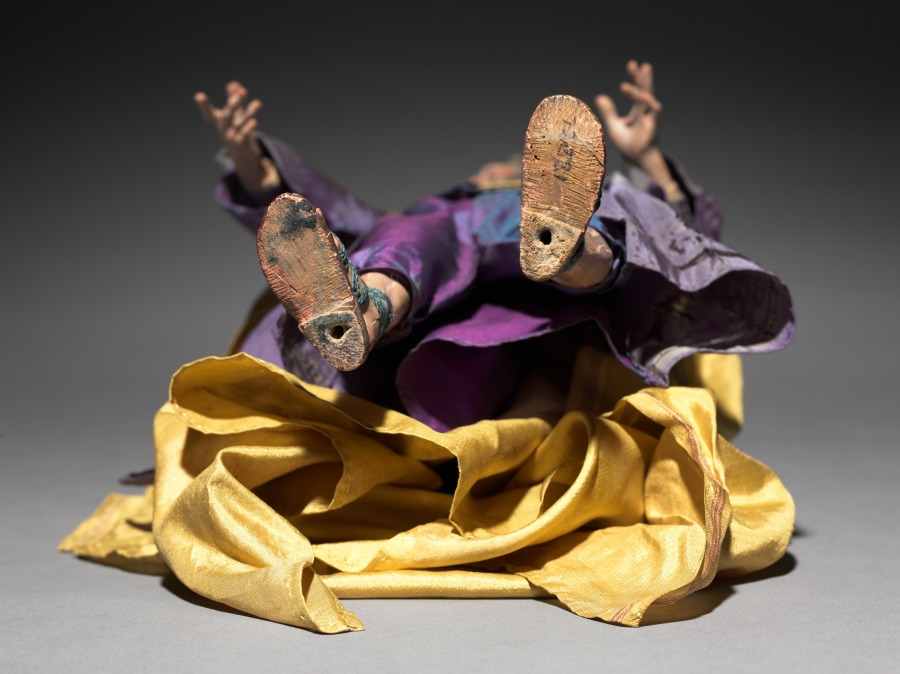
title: Figure from a Crèche: Joseph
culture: Italy, Naples, late 18th-early 19th century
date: 1780–1830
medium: painted wood and terracotta with various textiles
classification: Sculpture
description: The practice of creating scenes of the Nativity for the home dates from the early 1700s in Italy, where people began to set up doll-like figures of about a foot or less in height. The custom was particularly popular in Naples around 1800, where crèche scenes (crèche means cradle, or crib) included many figures, whose heads and hands of painted terracotta, stuffed cloth bodies, and clothing adapted from contemporary local costumes gave them an amazingly realistic character. Representations of the birth of Jesus can be traced to the first few centuries of Christianity. Both living creatures and sculptural depictions of them were used from early times. By the late middle ages it was customary to create life-size figures of wood or stone, naturalistically painted, to represent the characters who participated in the events of Jesus's early life. These sculptures were then arranged in scenes illustrating one or both of the most important of these events, the Adoration of the Shepherds and the Adoration of the Magi-the three kings from the East who came to pay homage to the Christ child. Used in churches, these large figures were especially popular in Italy, Central Europe, Spain, and Portugal.